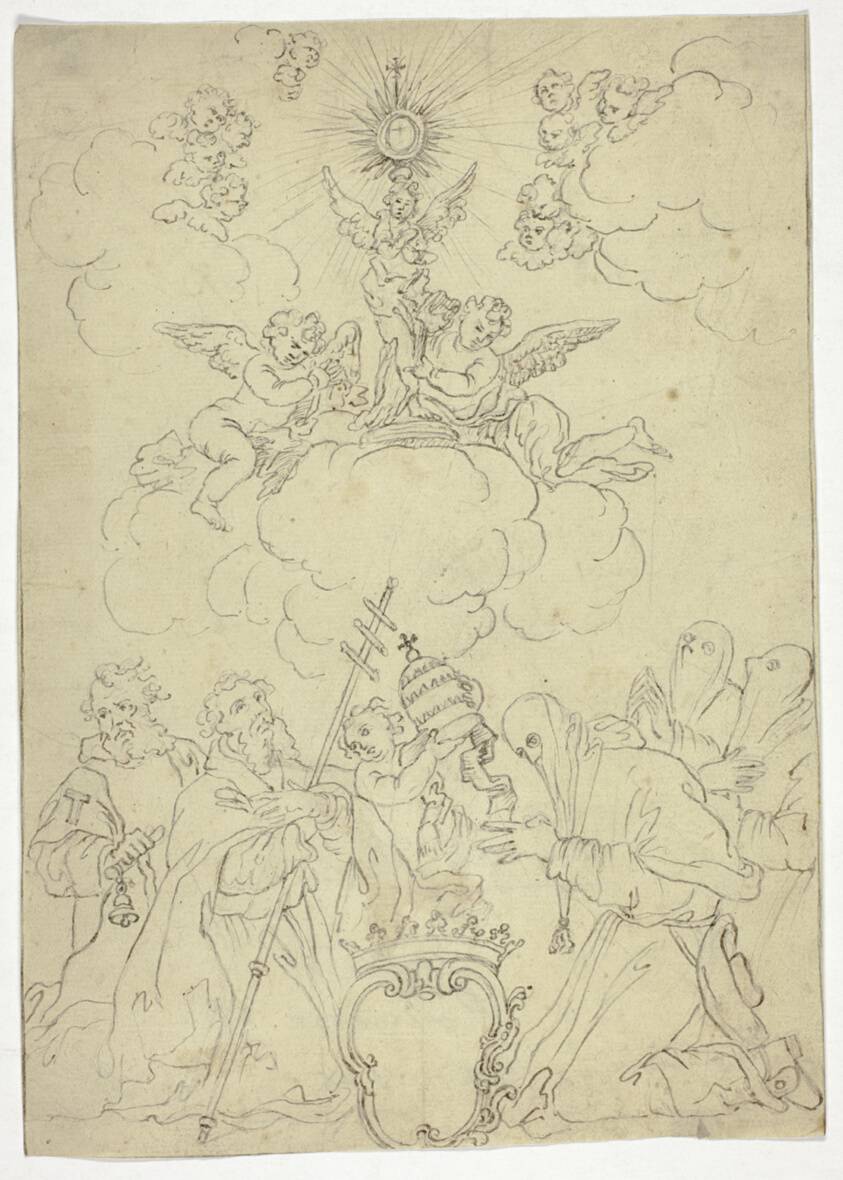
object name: Drawing and Watercolor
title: Untitled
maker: Uknown Artist (German, 18th century); or possibly Bartolomeo Granucci (Italian, flourished 18th century); or a follower of Giulio Pippi, called Giulio Romano (Italian, c. 1499-1546)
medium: Pen and brown ink, over traces of graphite, on cream laid paper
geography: Italy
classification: pen and ink drawings; drawings (visual works); prints and drawing